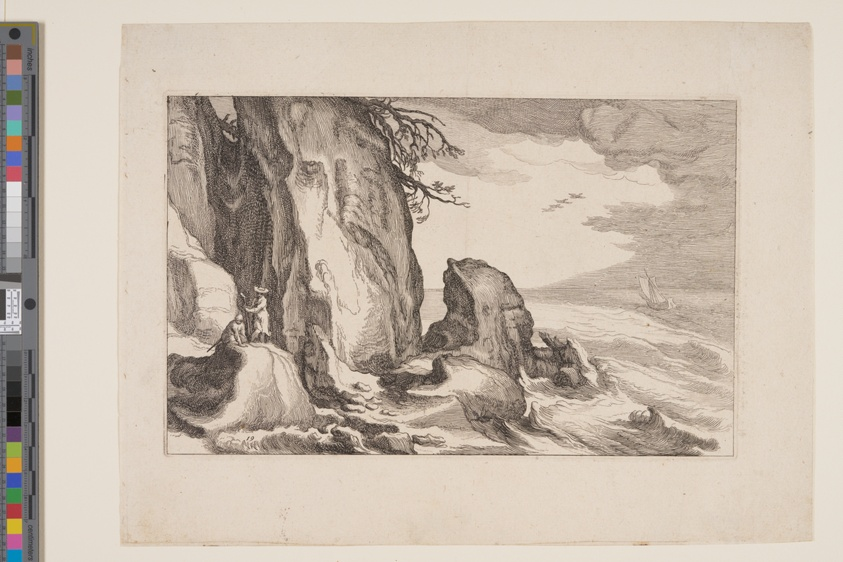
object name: Print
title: Plate 19, from Landscapes with Farmhouses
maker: Boëtius Adamsz. Bolswert (Flemish, 1580–1633); after Abraham Bloemaert (Dutch, 1566–1651)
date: 1614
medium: Etching on ivory laid paper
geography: Flanders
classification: print; paper; prints and drawing; etching